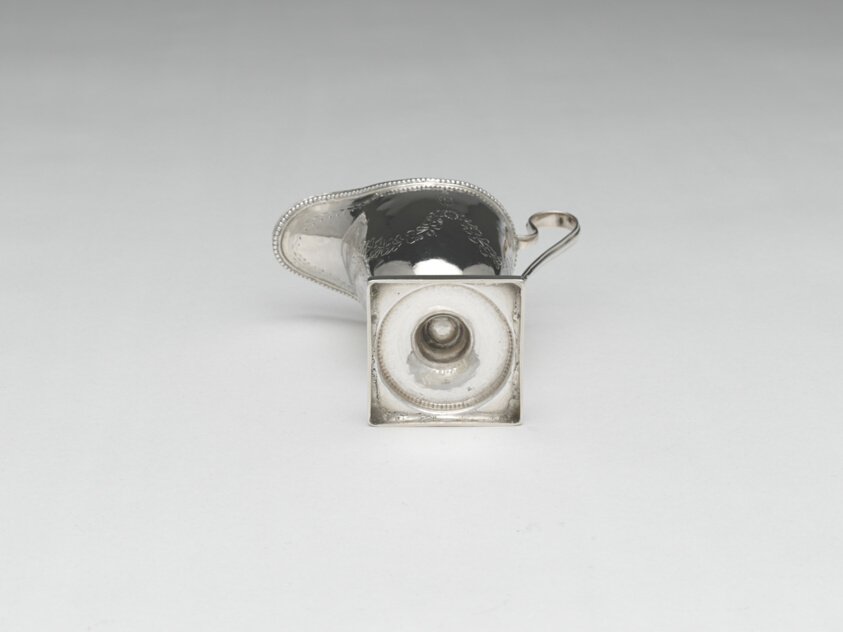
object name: Metalwork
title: Milk Pot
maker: Paul Revere Jr.; American, 1734–1818; Boston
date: 1784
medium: Silver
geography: Boston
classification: creamer; silver; american decorative arts; american arts; decorative arts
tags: dining, drinking